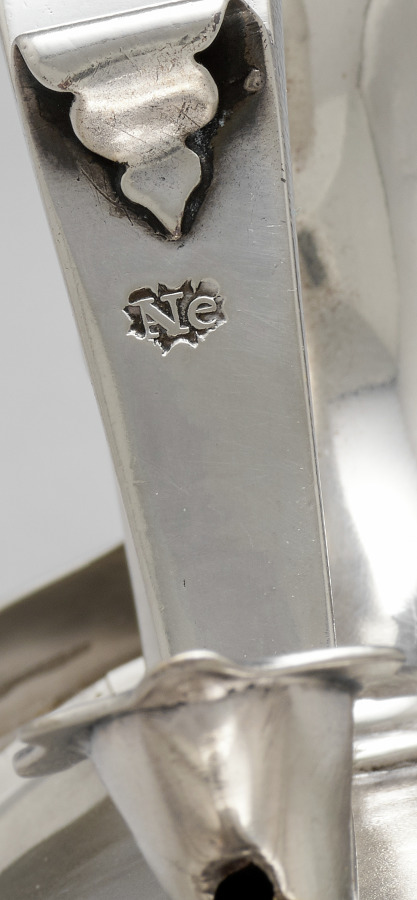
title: Tankard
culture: England, London, 18th century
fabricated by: Anthony Nelme (British)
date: 1703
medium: silver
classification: Silver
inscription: engraved beneath base: "H/RM." Engraved opposite handle crest with head of a blackamore; identified in Fairbairn as DEN family crest.